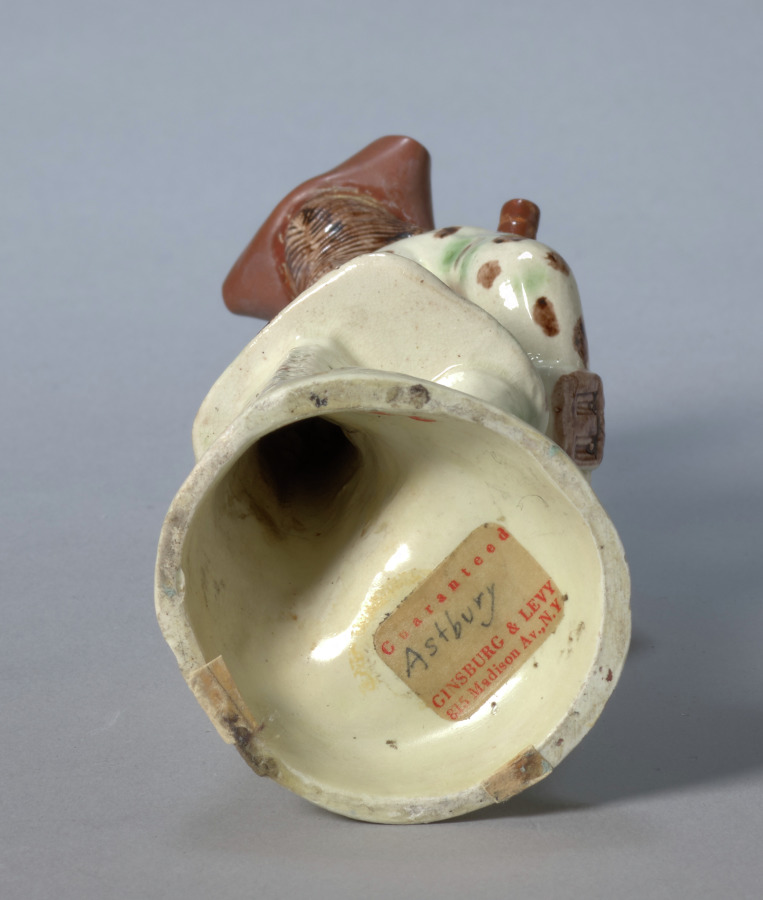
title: Bagpiper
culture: England, Staffordshire, 18th century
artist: Staffordshire Factory (British)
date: c. 1740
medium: earthenware (Astbury-Whieldon type)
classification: Ceramic